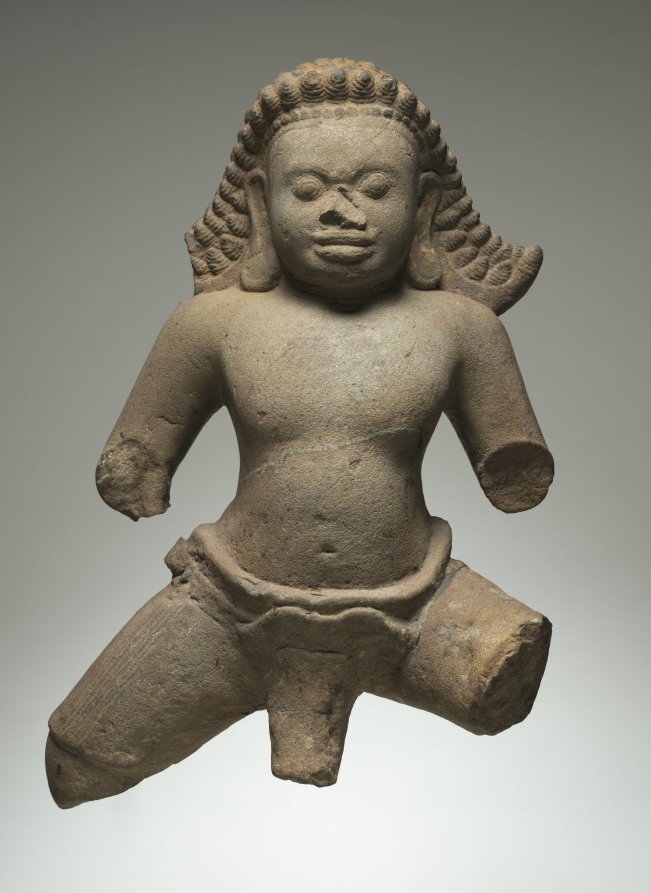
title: Rakshasa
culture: Cambodia, Koh Ker style, 2nd quarter 10th Century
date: 925–950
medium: sandstone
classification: Sculpture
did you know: This sturdy demon has bulging eyes and windblown hair, suggesting Rakshasa was more than a static guardian figure.